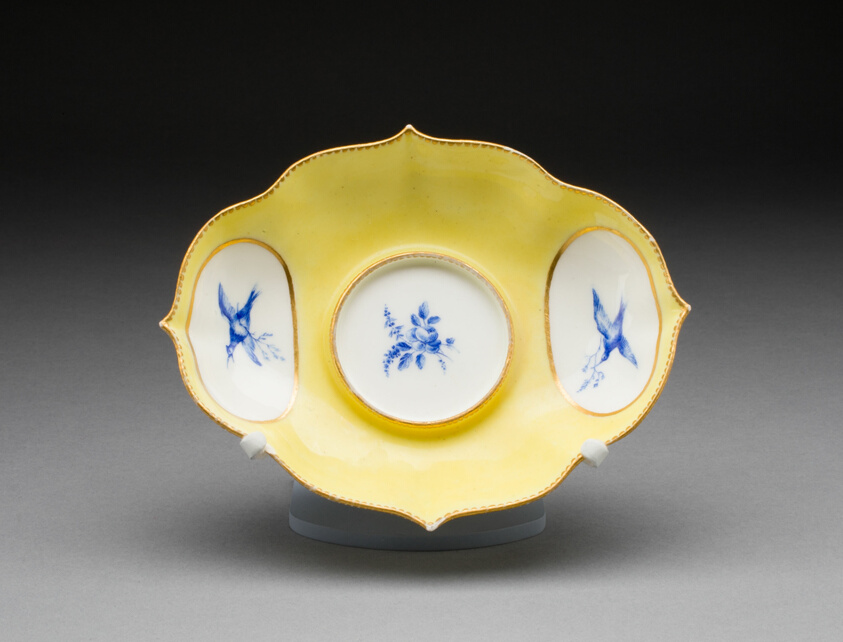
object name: Ceramics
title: Stand for a Mustard Pot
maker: Vincennes Porcelain Manufactory; French, founded 1740 (known as Sèvres from 1756); Painted by André-Vincent Vielliard (French, 1717-90, active 1752-90)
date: 1751/52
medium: Soft-paste porcelain, yellow ground, monochrome blue enamel, and gilding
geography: Vincennes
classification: tableware; ceramics; porcelain; european decorative arts